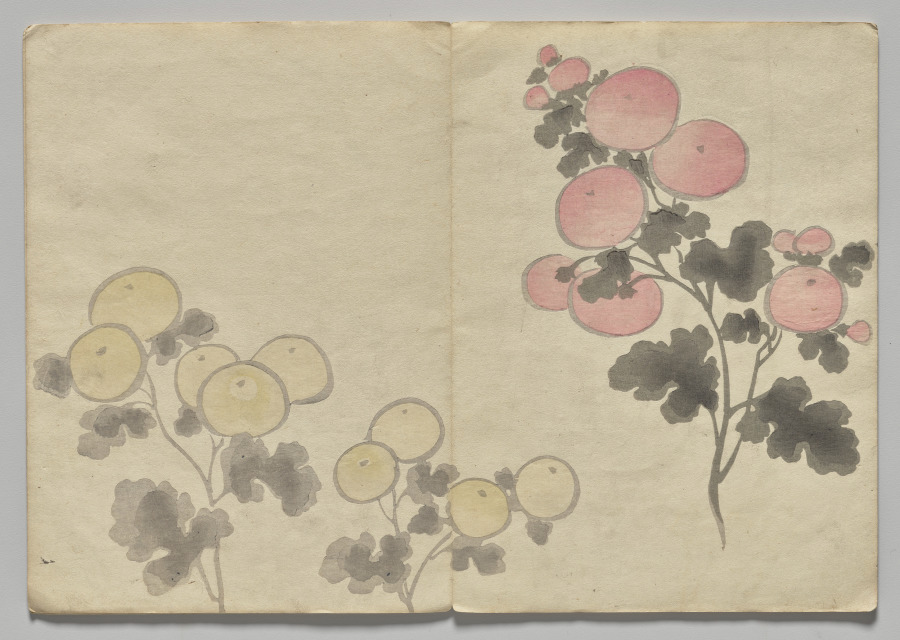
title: Scene from The Kōrin Picture Book (Volume 1)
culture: Japan, Edo period (1615–1868)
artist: Nakamura Hōchū (Japanese, d. 1819)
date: 1800s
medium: page in a woodblock printed folding-; ink and color on paper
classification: Bound Volume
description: Ogata Korin (1658-1716) was one of the most admired artists of Rimpa, or "decorative school painting." These books by the charming later-generation Rimpa artist Hochu record Korin's inventive designs.